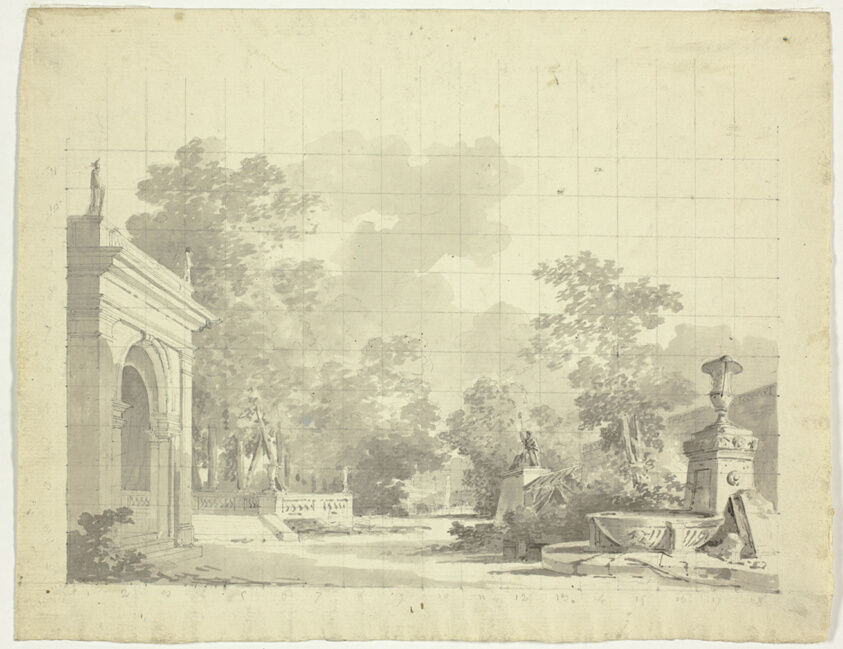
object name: Drawing and Watercolor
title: View of the Park at Versailles: Arched Entry to a Terrace, Urns and Ruined Statuary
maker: Pierre Antoine Mongin (French, 1761/62-1824/27)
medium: Brush and gray wash, with graphite, on cream laid paper, squared in graphite for transfer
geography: France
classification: ink or chalk wash; drawings (visual works); prints and drawing